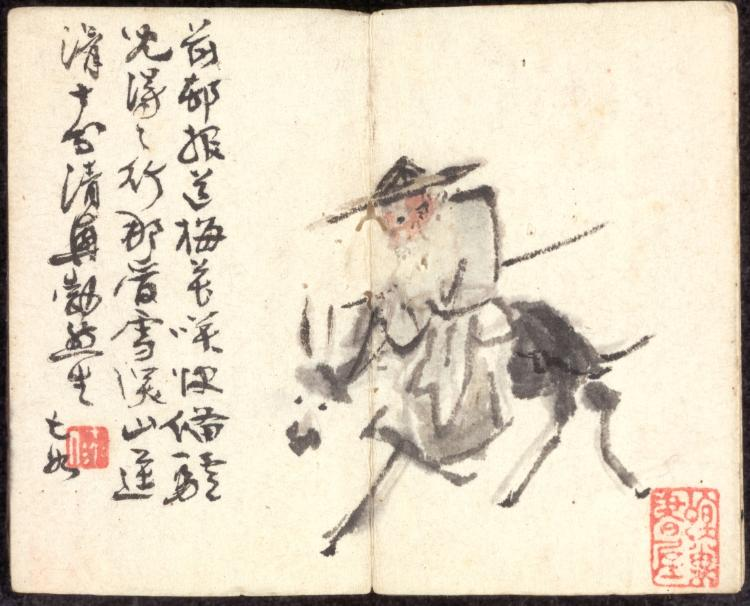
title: Miniature Album with Figures and Landscape (Old Man on Donkey)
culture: China, Qing dynasty (1644–1911), Qianlong reign (1736–95)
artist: Zeng Yandong (Chinese, c. 1751–1827)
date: 1822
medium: album leaf, ink and color on paper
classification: Painting